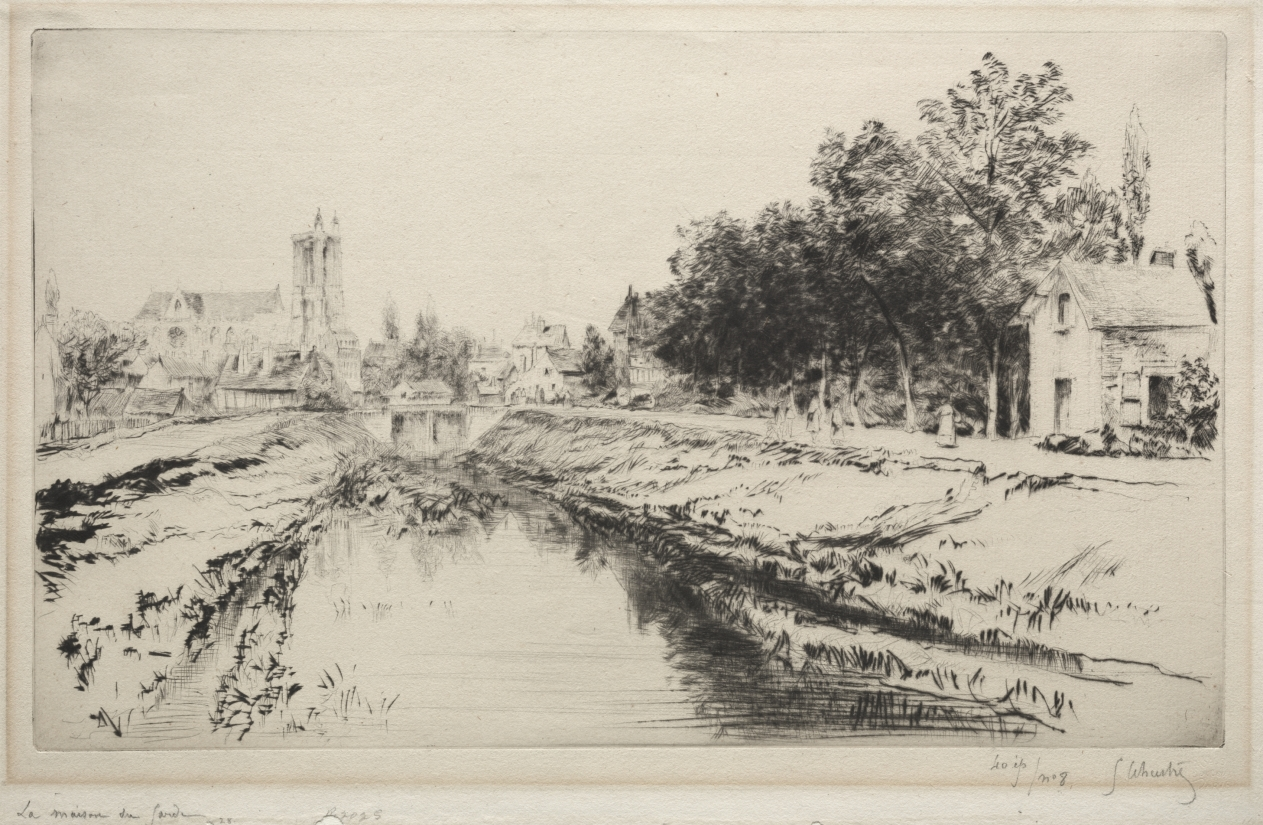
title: The Guardhouse, Troyes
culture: France, late 19th-early 20th Century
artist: Gustave Leheutre (French, 1861–1932)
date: 1901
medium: etching and drypoint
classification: Print